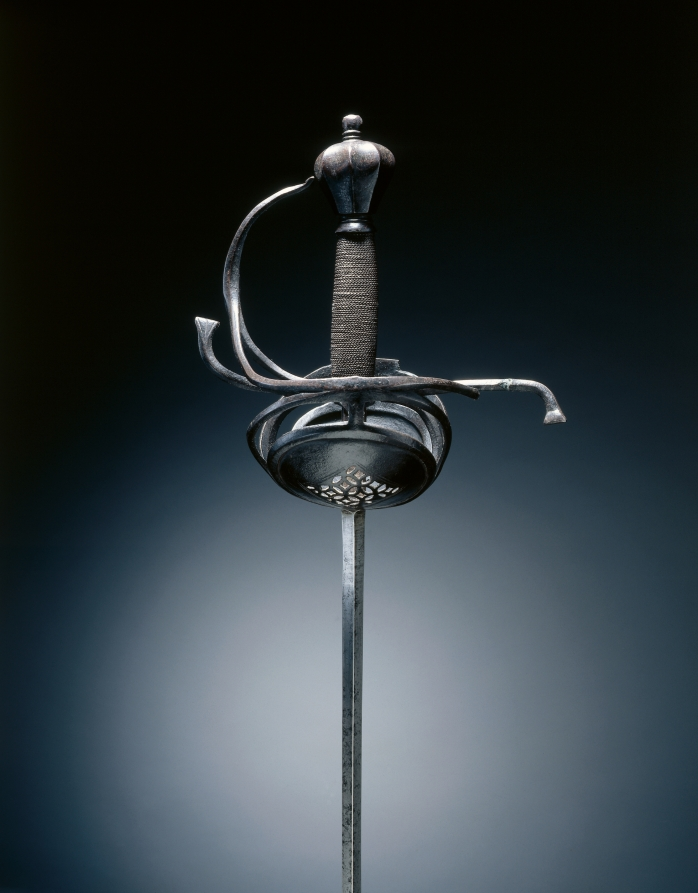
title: Rapier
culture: Italy, Milan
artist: Federico Picinino (Italian)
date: c.1625–50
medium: steel; hilt russeted; wire grip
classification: Arms and Armor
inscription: on ricasso: Federico Picinino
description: The rapier was a sword worn with civilian dress and used in duels. The term rapier derives from the 16th-century French word rapière, which in turn was derived from the Spanish espada ropera, or “dress sword.” The rapier was a light weapon with a straight double-edged and pointed blade that, with the development of the art of fencing in the 1500s and 1600s, gradually became narrower and lighter, and thus suitable for thrusts only. With the new technique of swordplay emphasizing the point of the blade, sword guards became more complex to protect the duelist’s unarmored hand. These elaborate guards were frequently decorated by various techniques—chiseling, bluing, russeting, and damascening.